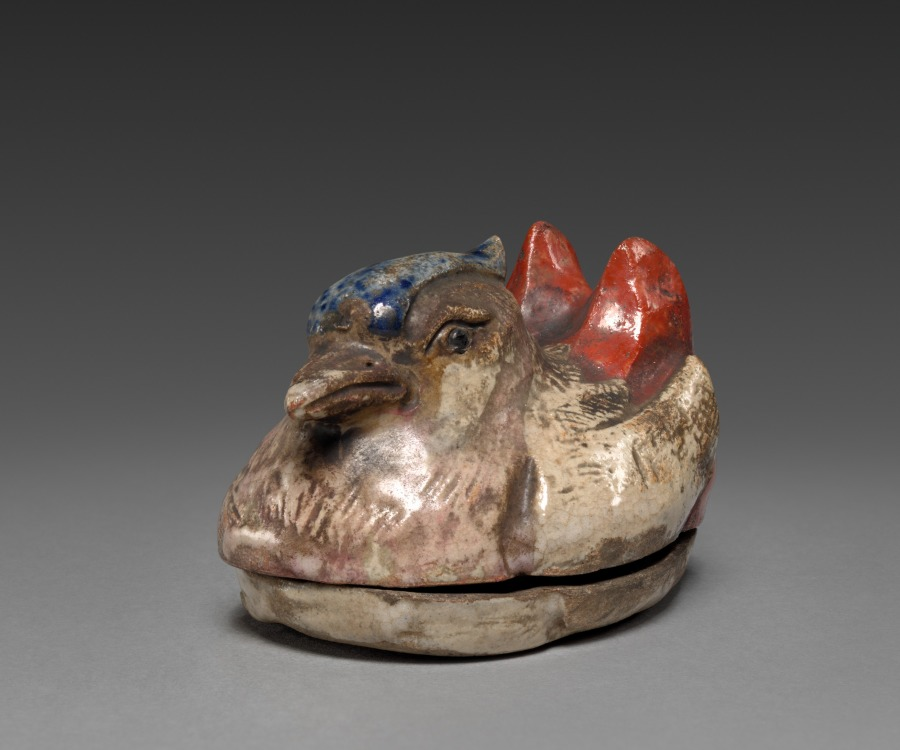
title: Incense Container (Kōgō) in the Shape of a Mandarin Duck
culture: Japan, Edo period (1615–1868)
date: c. 1700–1868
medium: Stoneware with glaze and incised decoration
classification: Ceramic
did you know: The artist incised the bird's feet on the bottom of the box.